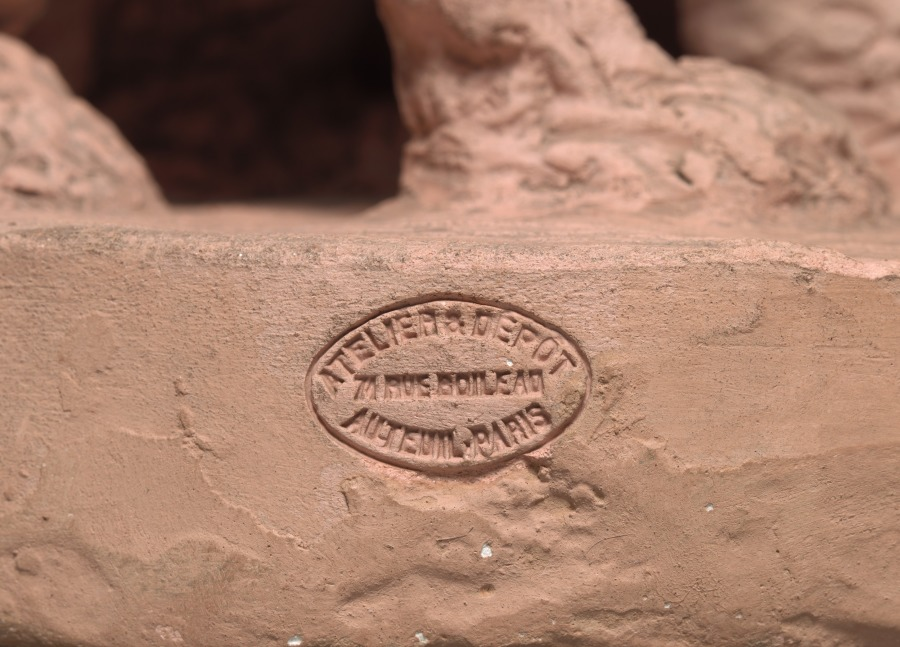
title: Brother and Sister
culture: France, 19th century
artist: Jean-Baptiste Carpeaux (French, 1827–1875)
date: 1875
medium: terracotta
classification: Sculpture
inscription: Signed "JBT" Carpeaux/1875" upper surface of base.